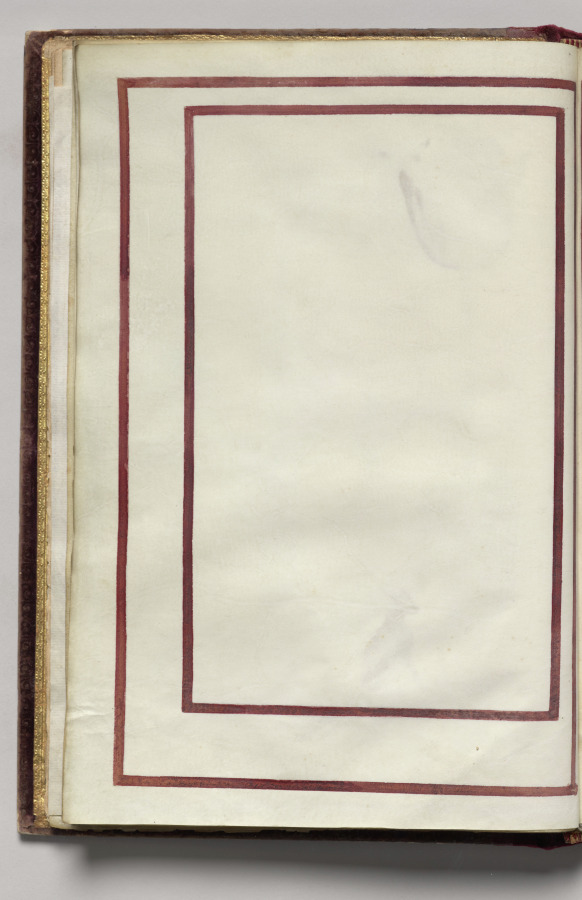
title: Border, folio 9 (verso), from Florilegium (A Book of Flower Studies)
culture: France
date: 1608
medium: watercolor, ink, silver and gold over occasional traces of pencil, on vellum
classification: Bound Volume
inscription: Dated: Poitiers 1608 (on frontispiece) Signed: On frontispiece in black ink, lower right: Van Kuyk Notation on drawing: Frontispiece: in pencil, lower margin: * élève de Van Kessel, peintre flammand (* in pencil also appears in front of Van Kuyk's name).